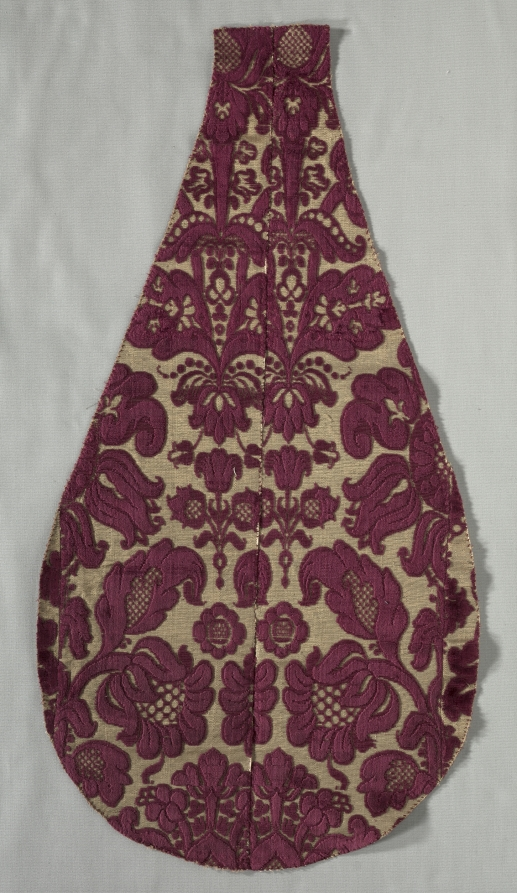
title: Velvet Fragment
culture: Italy, late 17th century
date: late 1600s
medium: velvet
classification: Velvet